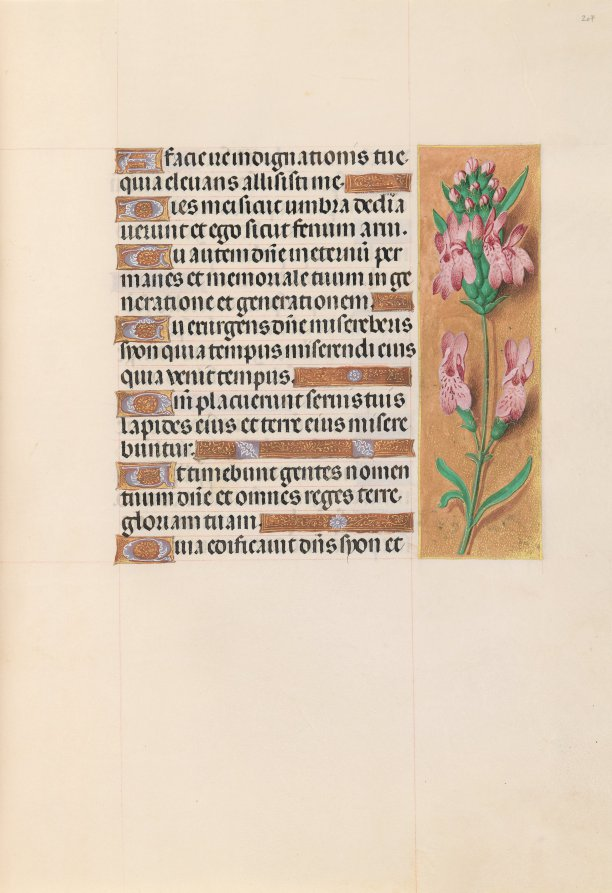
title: Hours of Queen Isabella the Catholic, Queen of Spain: Fol. 207r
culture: Flanders, Ghent and Bruges, late 15th century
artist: Master of the First Prayerbook of Maximillian (Flemish, c. 1444–1519)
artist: and Associates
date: c. 1500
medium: ink, tempera, and gold on vellum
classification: Bound Volume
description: This manuscript was illuminated by a circle of at least five highly organized manuscript painters active in the Flemish cities of Ghent and Bruges. The principal illuminator was Alexander Bening, who painted the majority of the book's miniatures. Manuscripts produced by this circle of artists are renowned for the decoration of their borders, which typically feature a rich variety of realistically-painted flowers, birds, and butterflies. This prayer book, called a book of hours, was intended not for a cleric, but for the private devotions of a lay person-in this case, Isabella the Catholic, Queen of Spain (1451-1504). Isabella's coat of arms embellishes the book's frontispiece. It is unlikely that the book was commissioned by the Queen herself; rather, she probably received it as a diplomatic gift from someone courting her patronage, perhaps Cardinal Francisco Jimenez de Cisneros. A Franciscan friar, Jimenez was dependent upon Isabella for his advancement, first to the post of Queen's confessor in 1492, and then to Archbishop of Toledo in 1495.